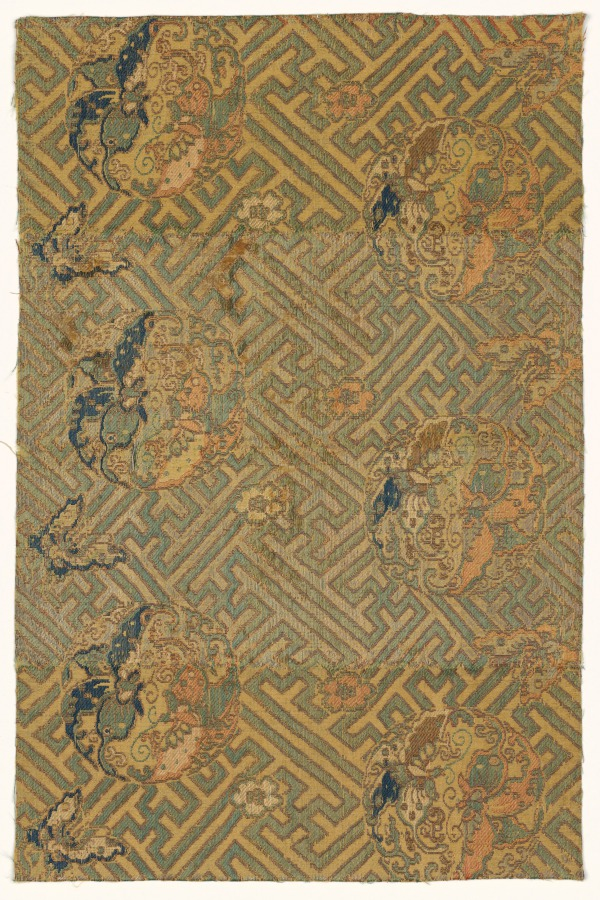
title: Fragment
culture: China, 19th century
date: 1800s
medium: silk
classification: Textile